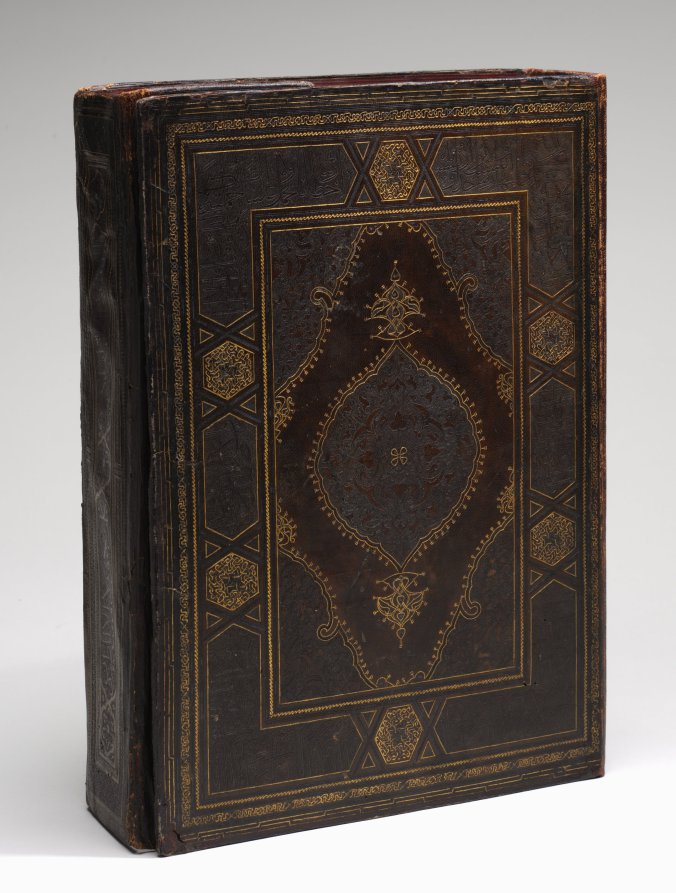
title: Bookbinding for a Qur'an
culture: Turkey, Istanbul, Ottoman period, 15th century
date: 1460–1500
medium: leather over paper pasteboards; outer cover tooled, blue paint; inner covers openwork designs over colored papers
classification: Book Binding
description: Islamic book covers generally have a triangular flap attached to the rear cover of the binding which is tucked under the front cover to protect the outside edge of the pages. The outer covers of this particularly elaborate example feature panels with Qur'anic inscriptions, interlace patterns, and a central medallion filled with floral and arabesque designs. The inner covers offer a superb example of leather openwork, a leather technique that originated in northeastern Iran in the 1400s.